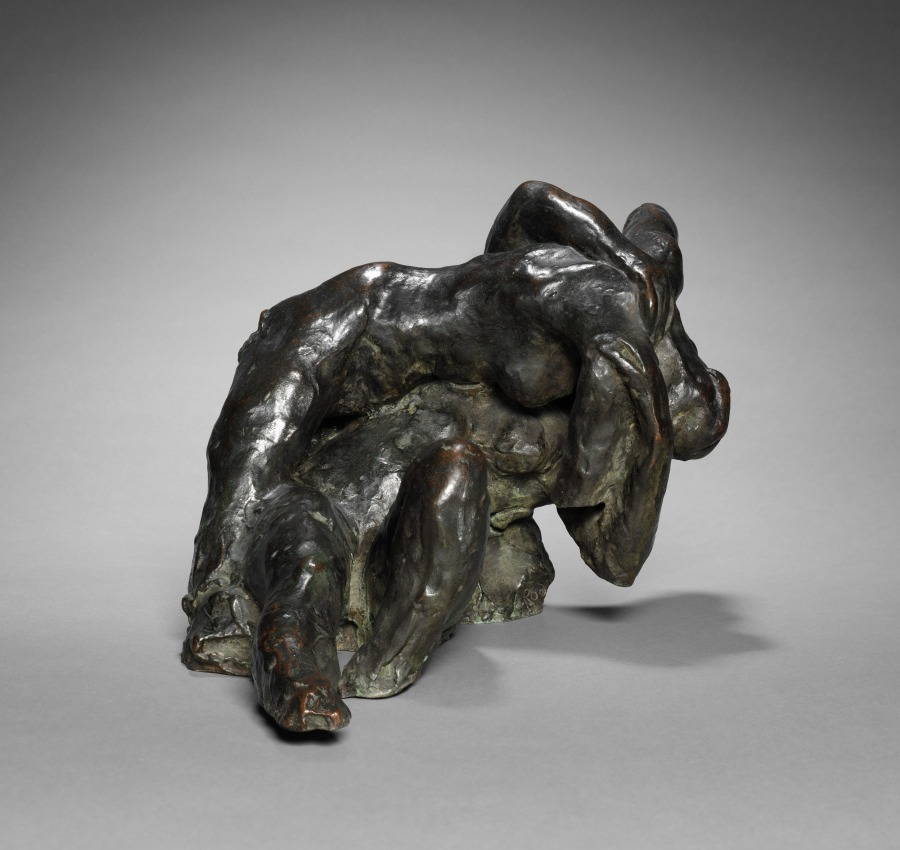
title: Les Damnées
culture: France, 19th century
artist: Auguste Rodin (French, 1840–1917)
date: 1885–1895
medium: bronze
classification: Sculpture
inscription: Signed front bottom right: "A. Rodin"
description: Rodin derived this couple, whose twisted bodies are locked painfully together, from the naked figures writhing in agony in his monumental sculpture The Gates of Hell.